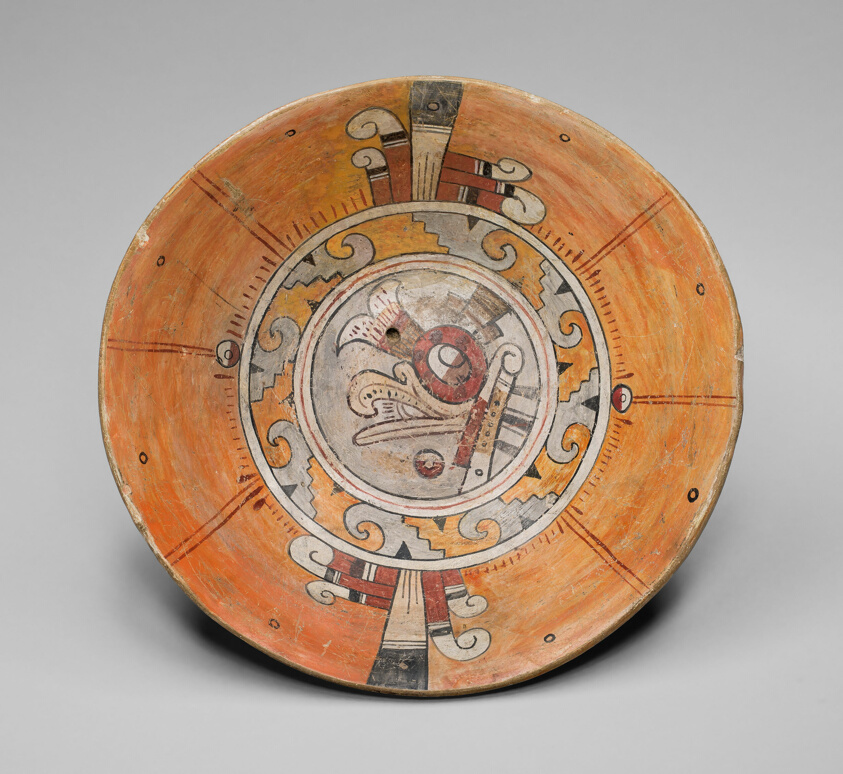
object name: Vessel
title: Tripod Bowl Depicting Head of Bird on its Interior Surface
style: cholula, Arts of the Americas, mesoamerican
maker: Cholula, Mixteca-Puebla style; Puebla, central Mexican highlands, Mexico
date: 1200–1521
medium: Ceramic and pigment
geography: Cholula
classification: bowl; earthenware; ceramics; vessel; art of the americas